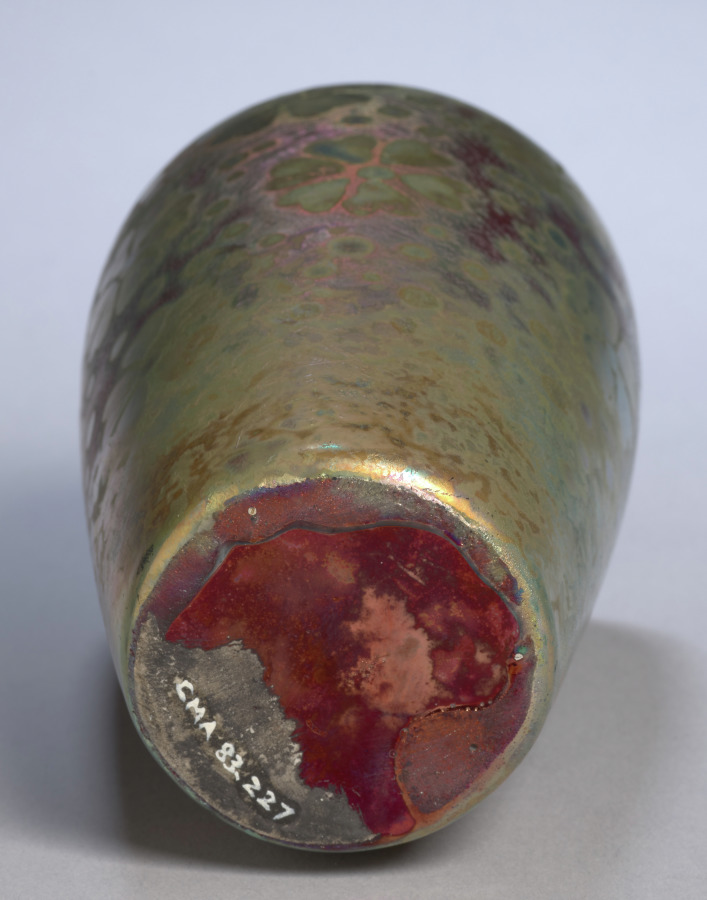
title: Vase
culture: America, Ohio, Zanesville, early 20th Century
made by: Weller Pottery (American)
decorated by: Jacques Sicard (French, 1865–1923)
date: early 1900s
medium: earthenware decorated with lustre glazes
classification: Ceramic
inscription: inscribed on side near bottom: "Weller/Sicard."